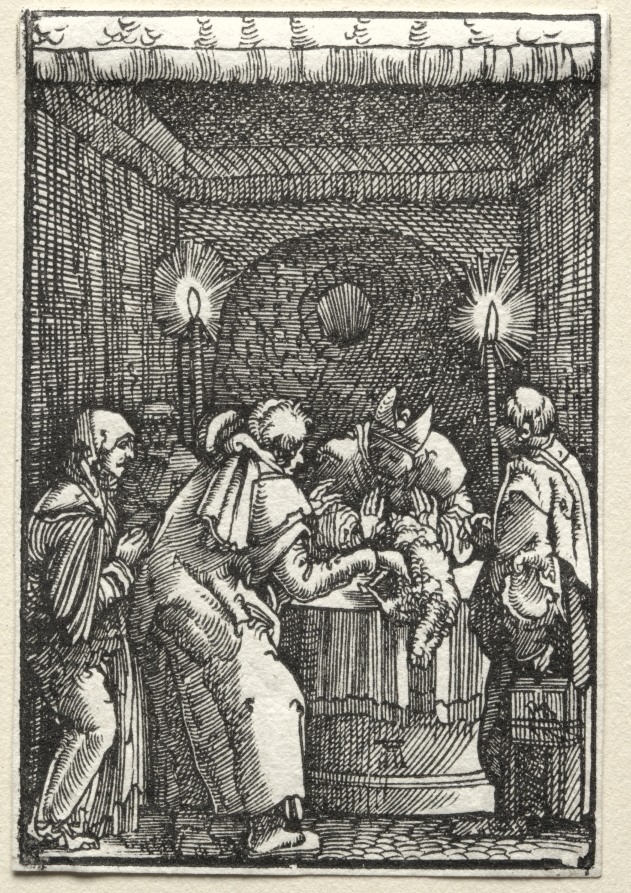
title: The Fall and Redemption of Man: Joachim's Offering Rejected by the High Priest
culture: Germany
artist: Albrecht Altdorfer (German, c. 1480–1538)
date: c. 1515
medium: woodcut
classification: Print